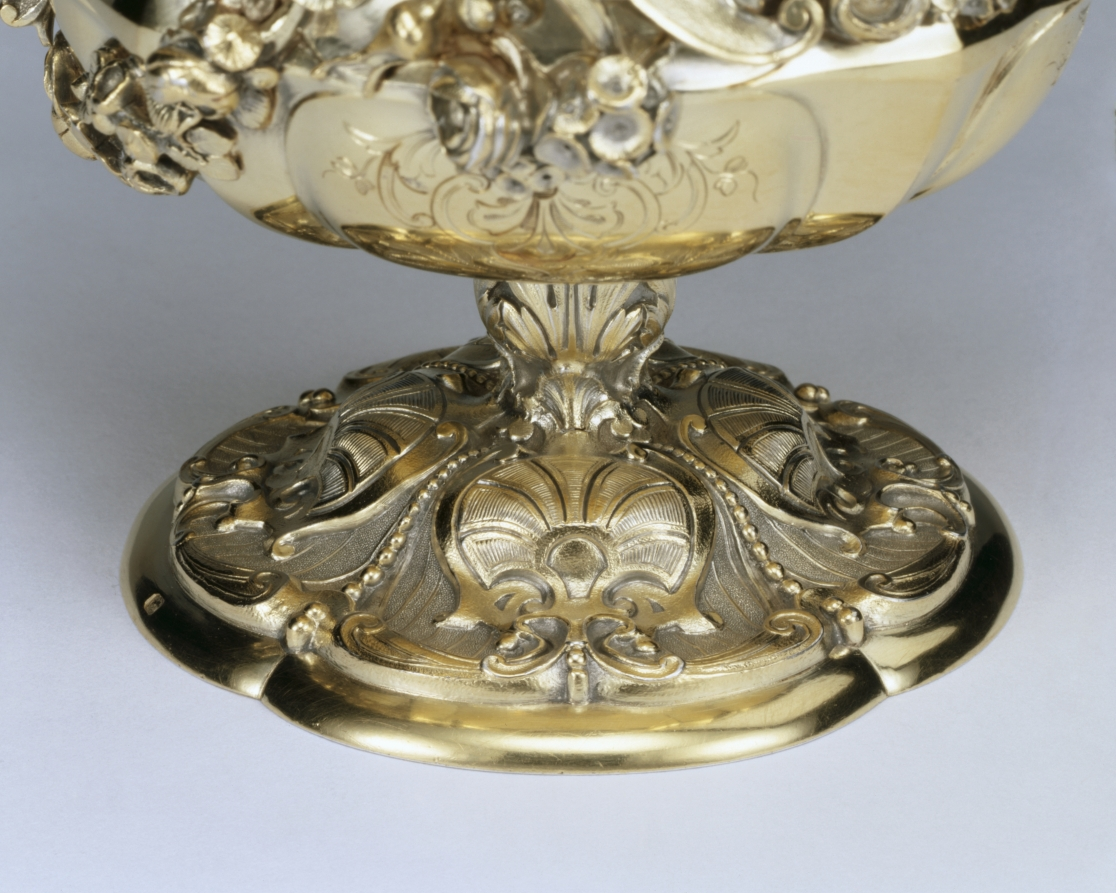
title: Covered Jug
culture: France, 19th century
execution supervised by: Jean-Valentin Morel (French, 1794–1860)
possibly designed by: Jules Dieterle (French, 1811–1889)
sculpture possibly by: Jules Klagmann (French, 1810–1867)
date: c. 1845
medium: gilded silver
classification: Silver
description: The elegance and richness of this ewer demonstrate the high level of technical mastery achieved by its maker. Morel studied under his father, a Parisian lapidary (someone who cuts, polishes, and engraves hard stones), and with Adrien Vachette, a maker of gold boxes. In 1842 he went into partnership with Charles-Edmond Duponchel, which lasted until the late 1840s, at which time he established himself in London, remaining there until 1852, when he returned to Paris. Morel frequentlyfollowed the designs of others, and it has been suggested that in the case of this pitcher his well-known contemporary, Jules Dieterle (1811-1889), may have conceived the overall form. The female figure seems to have been based on a design by the sculptor Jules Klagmann (1810-1867).